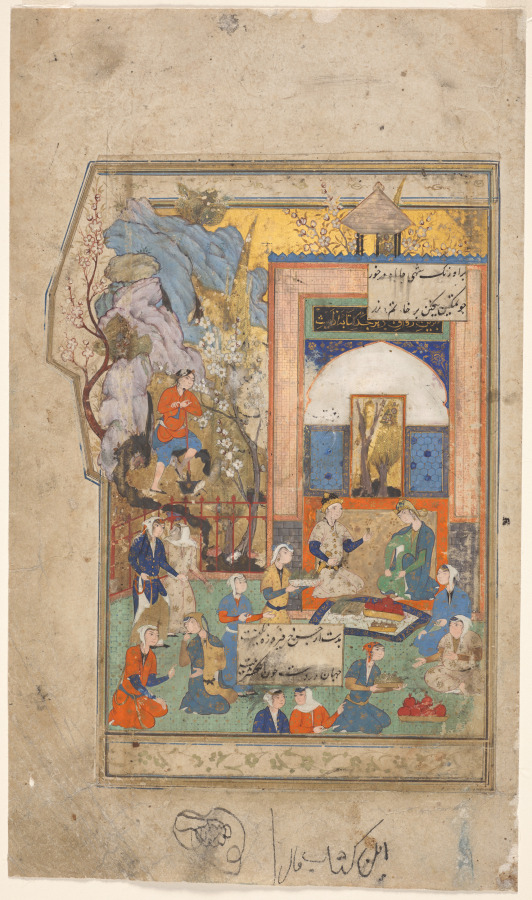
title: Yusuf and Zulaykha (recto), from an Anthology of Persian Verses, including the Haft Awrang (Seven Thrones) of Jami: The Fifth Throne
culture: Iran, Shiraz or Mashhad, Safavid period (1501–1722)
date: c. 1556–65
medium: Gum tempera, ink, and gold on paper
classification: Manuscript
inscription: Script: Nasta'liq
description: The painting quotes verses from the Haft Awrang (Seven Thrones) by the Persian poet Jami, a classic of Persian literature, here illustrating the romance of Yusuf and Zulaykha. Originally rooted in the Qur’an (Surah Yusuf, chapter 12), the Prophet Yusuf (Joseph) encounters the wife of the Egyptian governor, traditionally identified as Zulaykha, both seated opposite each other on the right, framed by architecture.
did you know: Figs and pomegranates, being served to the couple, are symbolic of fertility.